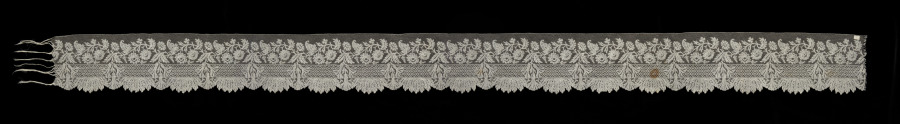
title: Lace Edging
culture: France, Valenciennes or Flanders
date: 1900–1935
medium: Linen: bobbin lace (Valenciennes)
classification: Lace